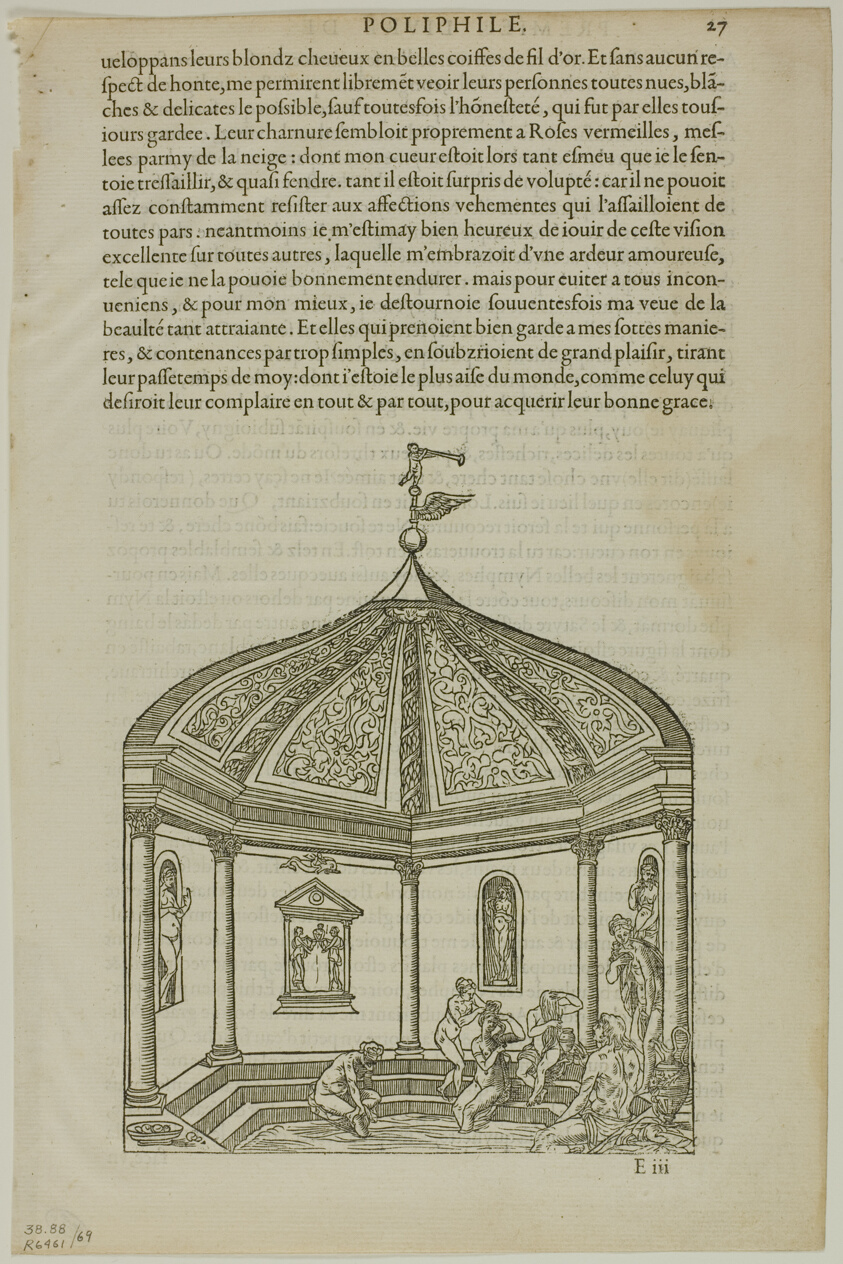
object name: Print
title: Bath House from Hyperotomachie ou discours du son gede Poliphile, plate 69 from Woodcuts from Books of the XVI Century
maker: Jean Goujon (French, c.1510-c.1565); assembled by Max Geisberg (Swiss, 1875-1943)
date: 1554, assembled into portfolio 1937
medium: Woodcut on paper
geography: France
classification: woodcut; print; prints and drawing